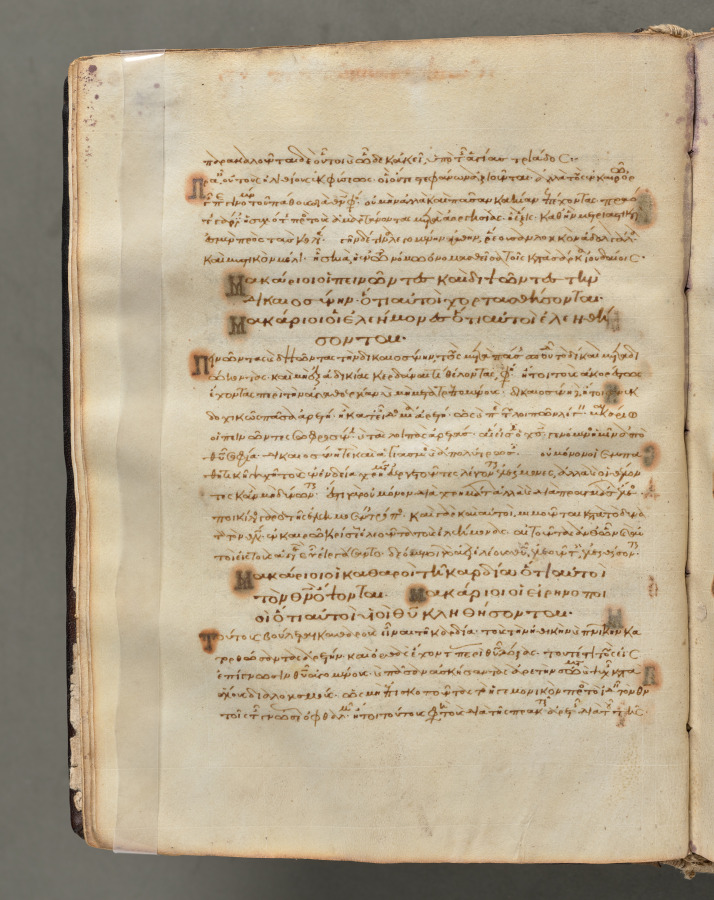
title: Text, folio 18 (verso), from a Gospel Book with Commentaries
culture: Byzantium, Constantinople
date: c. 1000–1100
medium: ink, tempera, and gold on vellum; leather binding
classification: Bound Volume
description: Each of the four gospels in this book opens on a page with brilliantly illuminated borders depicting the author of the text as well as birds-principally peacocks, symbols of the immortality of the soul-and fountains, representing the fountain of life and the salvation of the soul. This volume consists of 428 leaves with texts in Greek. Its level of sophistication suggests that it was probably written and decorated in a monastery in Constantinople.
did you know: Gospel Books were carried in procession through Byzantine churches.